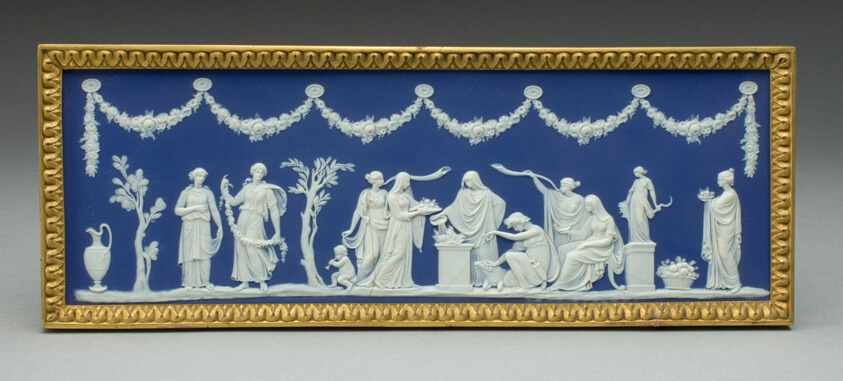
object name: Ceramics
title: Plaque with Sacrifice to Ceres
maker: Wedgwood Manufactory (England, founded 1759)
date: Possibly mid–19th century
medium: Stoneware (jasperware)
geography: Burslem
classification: sculpture; stoneware; european decorative arts; ceramics